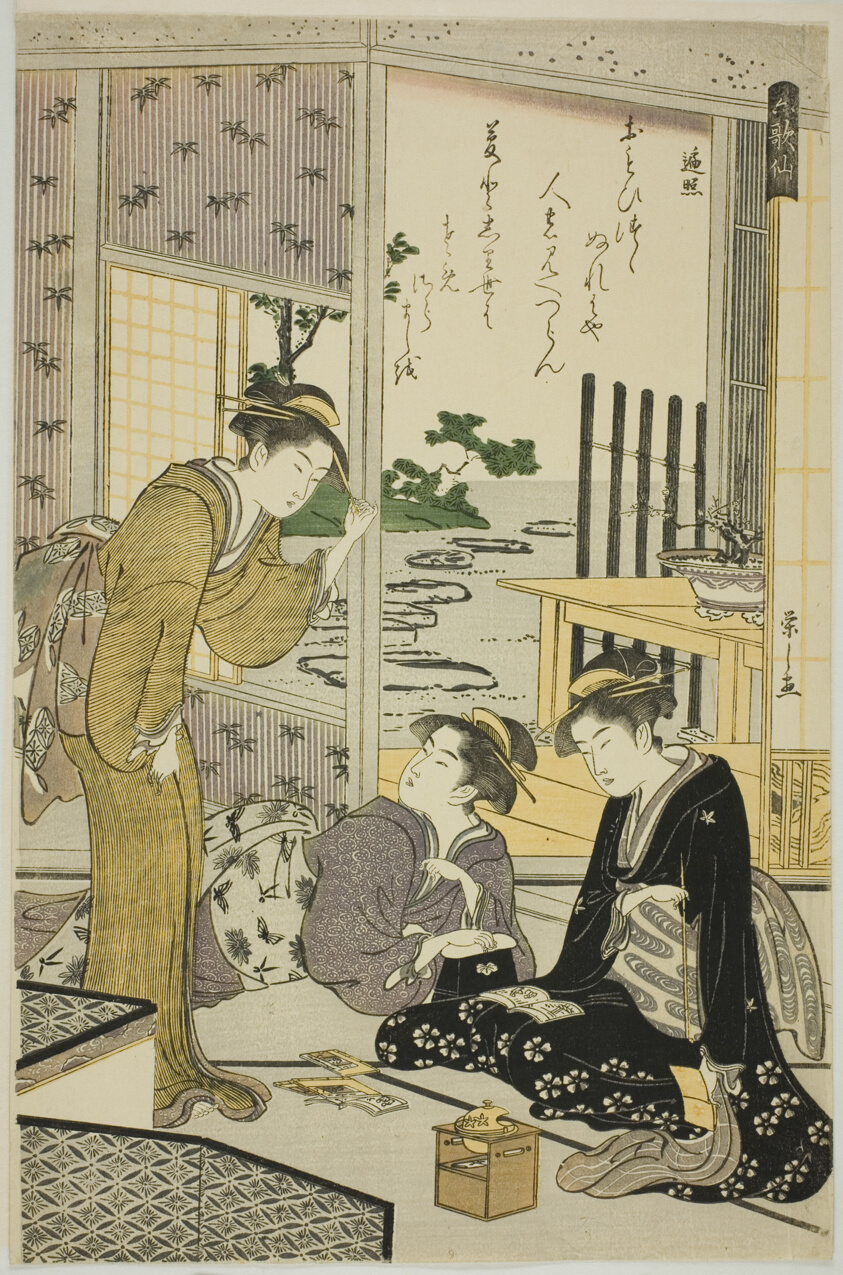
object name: Print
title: Henjo, from the series "Six Immortal Poets (Rokkasen)"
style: Japanese (culture or style)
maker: Chobunsai Eishi; Japanese, 1756-1829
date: c. 1789/90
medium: Color woodblock print; oban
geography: Japan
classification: print; asian art